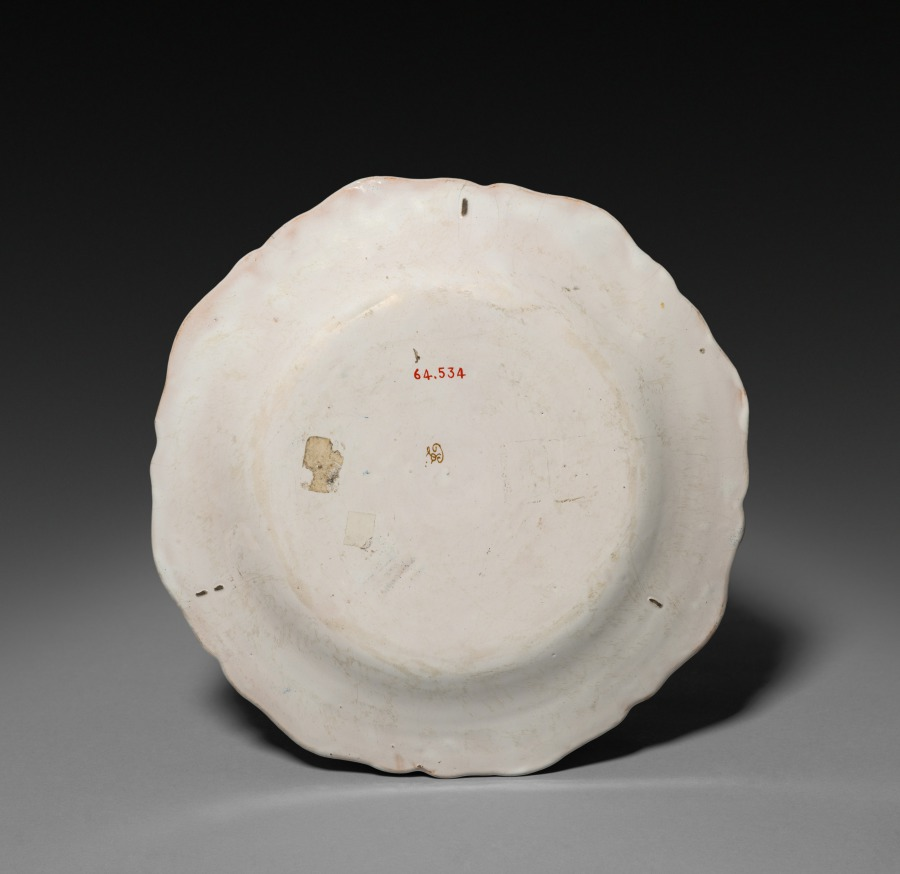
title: Plate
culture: France, Moustiers style, 20th century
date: 1900s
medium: faience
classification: Ceramic